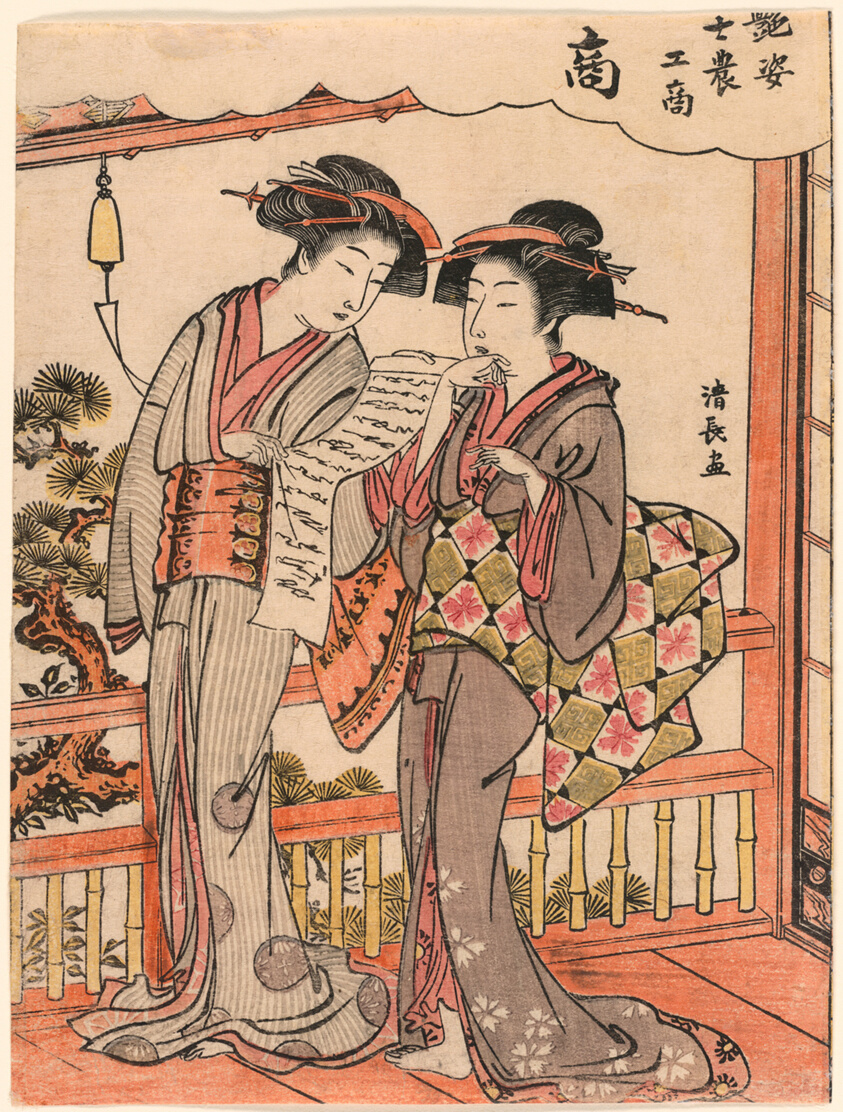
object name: Print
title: The Merchant (Sho) from the series Beauties Illustrating the Four Social Classes (Adesugata shi no ko sho)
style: Japanese (culture or style)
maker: Torii Kiyonaga (Japanese, 1752-1815)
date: c. 1779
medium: Color woodblock print; koban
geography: Japan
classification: woodblock print; print; asian art